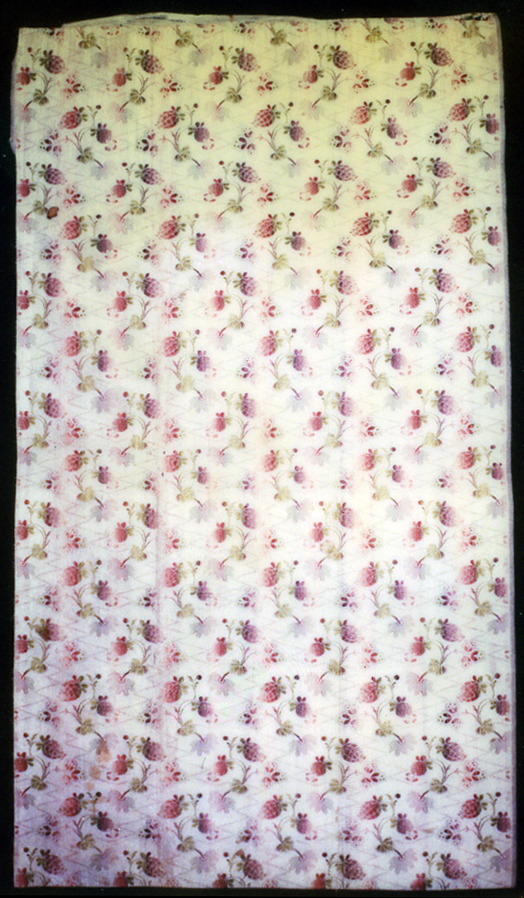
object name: Textile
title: Panel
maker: England, Spitalfields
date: 1750/1800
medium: Silk, plain weave with supplementary patterning warp floats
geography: England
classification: weaving; textile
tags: botanical, foliage, fruit, pineapples